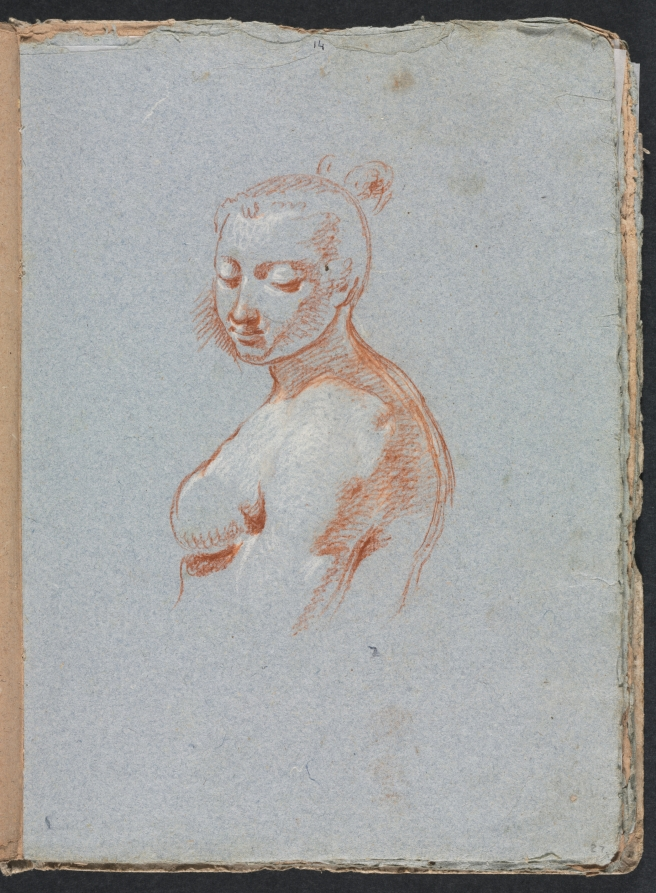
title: Verona Sketchbook: Female nude (page 27)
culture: Italy, 18th century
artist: Francesco Lorenzi (Italian, 1723–1787)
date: 1760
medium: red chalk with white heightening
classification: Bound Volume